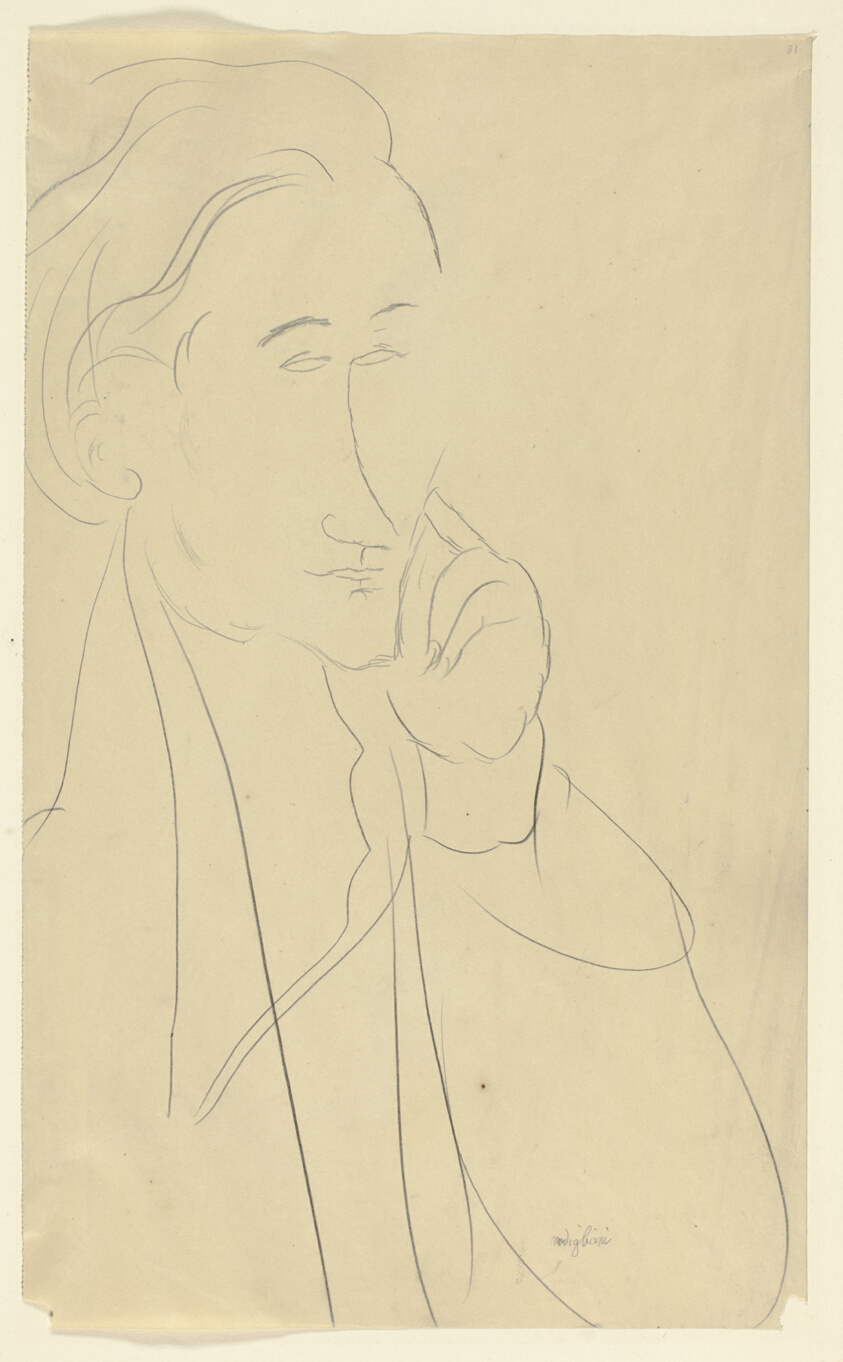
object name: Drawing and Watercolor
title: Bust of Zborowski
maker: Amedeo Modigliani (Italian, 1884-1920)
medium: Graphite on cream wove paper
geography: Italy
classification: drawings (visual works); prints and drawing